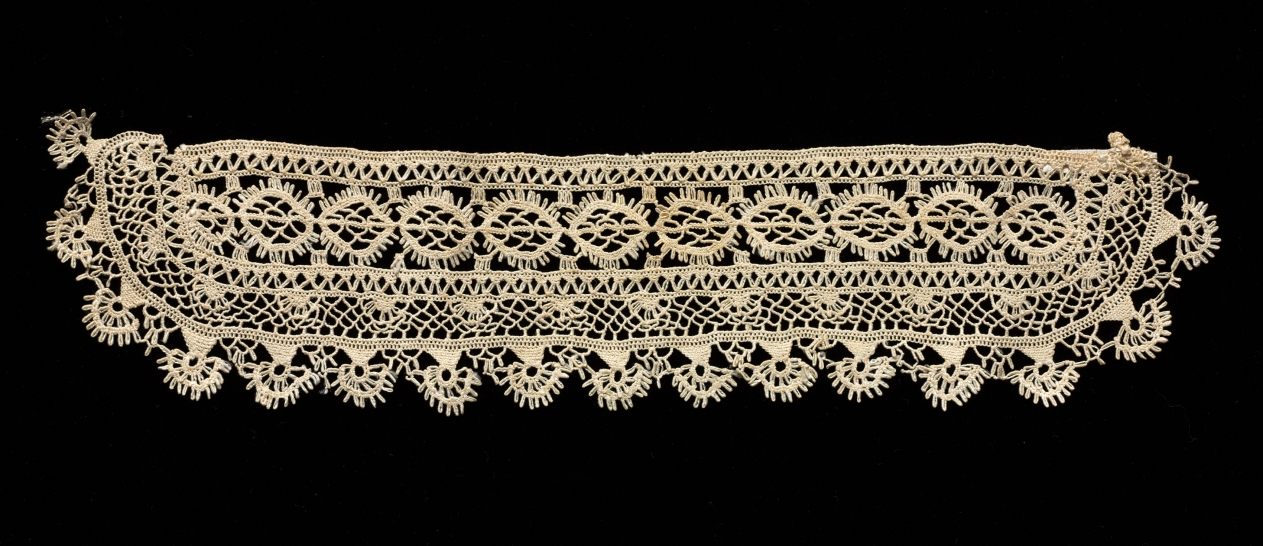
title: Lace Collar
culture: Italy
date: 1600s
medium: Knotted lace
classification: Lace